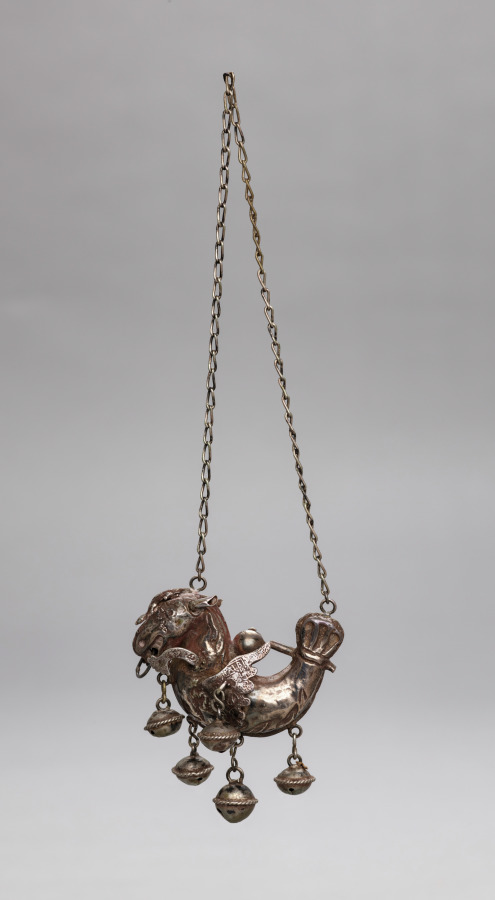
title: Rattle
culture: Italy, Sicily, 18th century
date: 1700s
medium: silver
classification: Silver